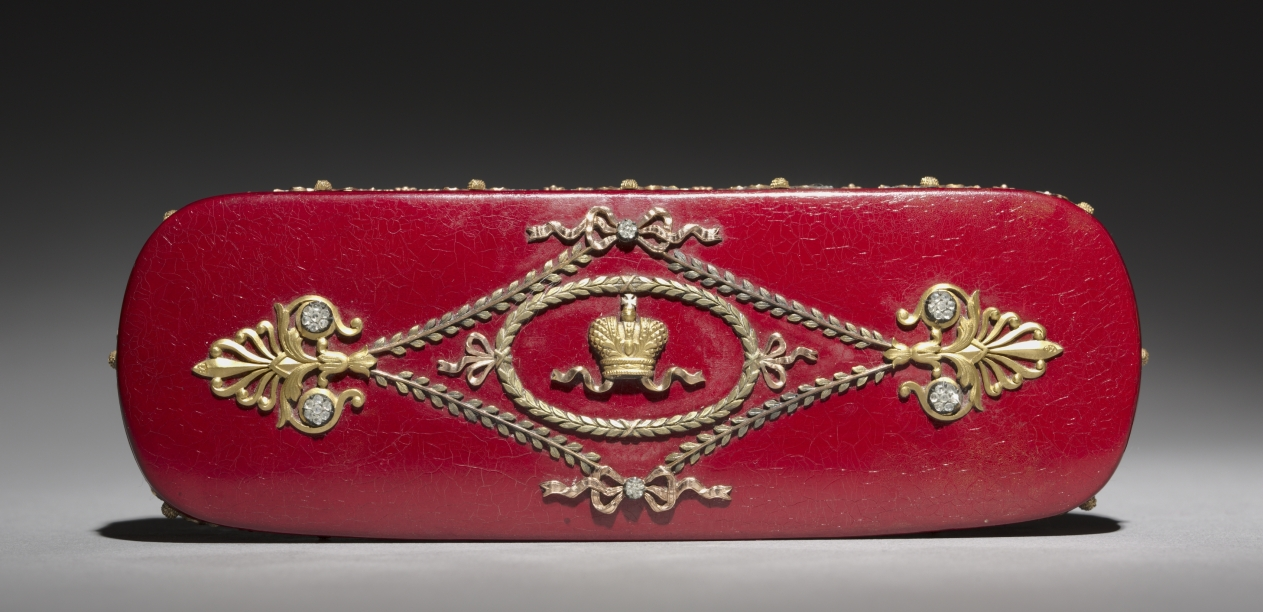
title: Lacquer Box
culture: Russia, St. Petersburg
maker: House of Fabergé (Russian, 1842–1918)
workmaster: Factory N. Lukutin (Russian)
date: c. 1890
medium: lacquer, papier-mâché, gold, diamonds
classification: Miscellaneous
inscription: inscribed (inside cover): Factory N. Lukutine (in Cyrillic script in gold); three double-headed eagles in gold.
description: This lacquer box was created by the Lukutin Factory, which was well known for creating boxes such as this one after Piotr Lukutin took charge of production and expanded the factory to include tea caddies and various desk accessories. This particular box from the Lukutin workshop is remarkable in its detailed gold patterns and diamond inlays that create an intentional contrast with the deep red surface.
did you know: Piotr Lukutin’s workshop employed over 50 skilled painters as well as acted as a school for training apprentices.